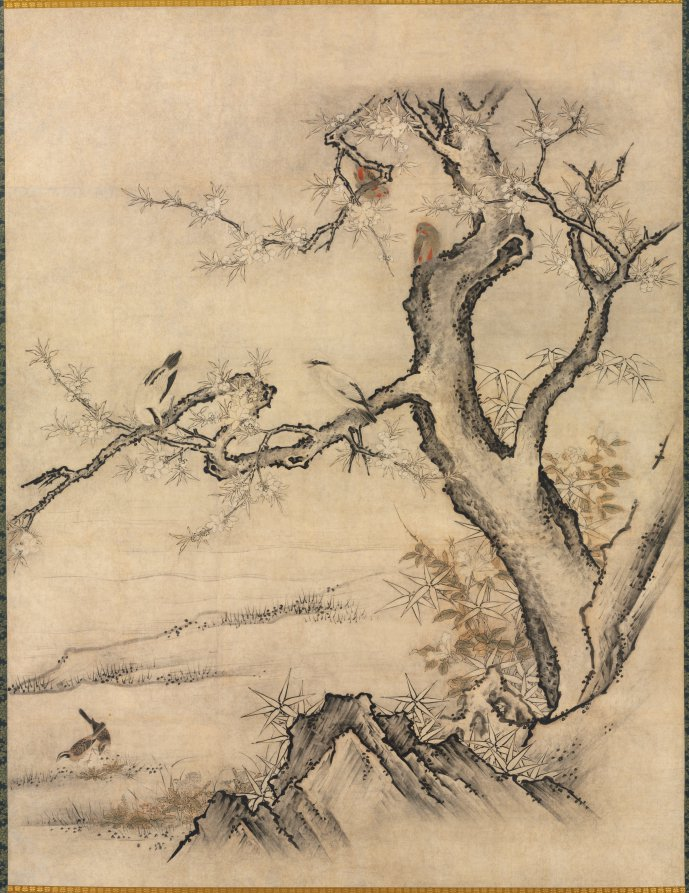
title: Flowers and Birds in a Spring Landscape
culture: Japan, Muromachi period (1392–1573)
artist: attributed to Kano Motonobu (Japanese, c. 1476–1559)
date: 1500s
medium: One of a set of sliding door panels mounted as hanging scrolls; ink and color on paper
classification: Painting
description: These four paintings originally decorated sliding doors that partitioned the interiors of Japanese buildings. Painters from the Kano school, named after the artist Kano Motonobu (1476–1559), were major forces in the production of screens and architectural interiors in Kyoto. When he headed the workshop, his work was prized by the upper strata of society. Kano is credited with combining the subtlety of Chinese black ink painting, as seen in the rocks and hills, with the color and realism of Japanese painting, seen in the birds and flowers. Landscape scenes like this were prized by the elite of Kyoto, both for their contemplative aesthetic and their patrons’ refined taste.